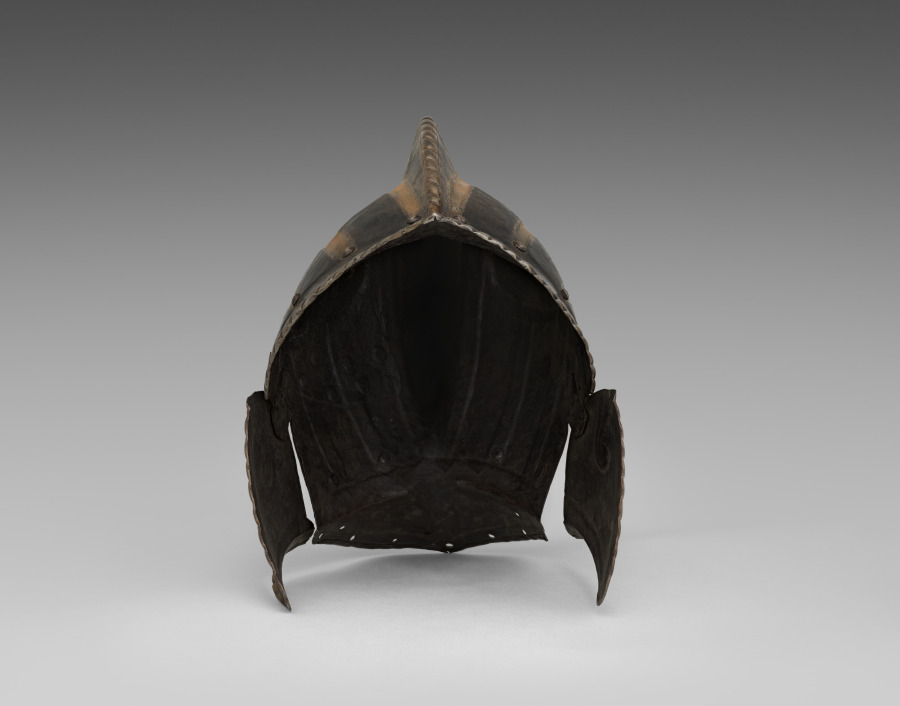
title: Black and White Burgonet (of the Civic Guard of Bologna)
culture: Italy, late 16th Century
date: c. 1580–1600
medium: steel with black paint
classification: Arms and Armor